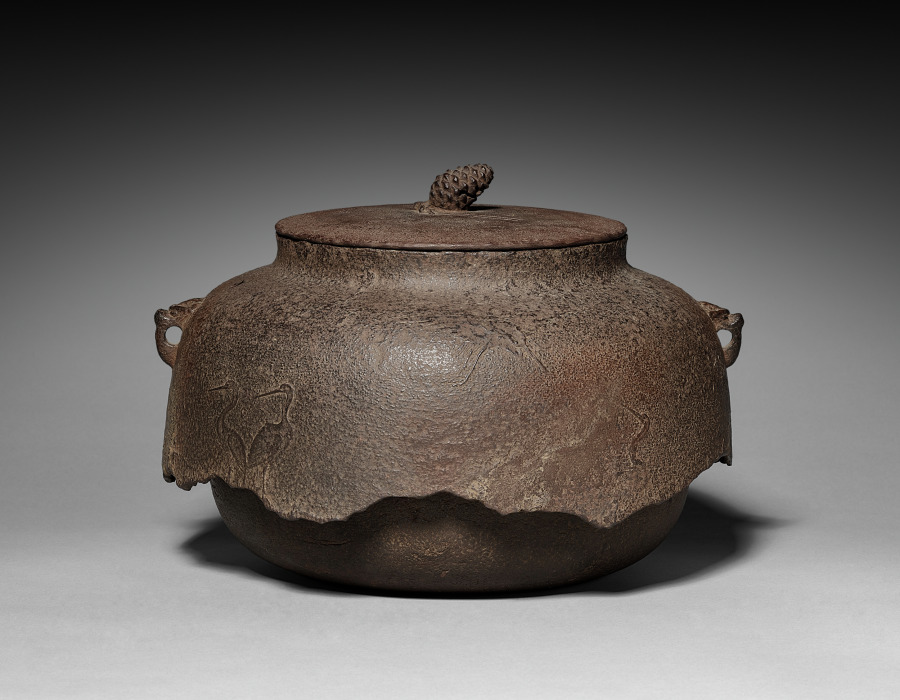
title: Kettle with Crane Design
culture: Japan, Muromachi period (1392–1573)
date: 1392–1573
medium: iron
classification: Metalwork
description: Water supplied from a jar such as the fine Shino-ware vessel (CMA 1972.9.a-b) was transferred to an iron kettle for boiling as part of the tea ceremony. Former CMA director Sherman Lee described the jagged, broken skirt of this kettle as "attractively damaged," complementing the unobtrusive wispy designs on its rough metal surface. The character of this kettle—worn, coarse, the "perfection" of symmetry destroyed—was cherished by tea masters for its powerful humility.